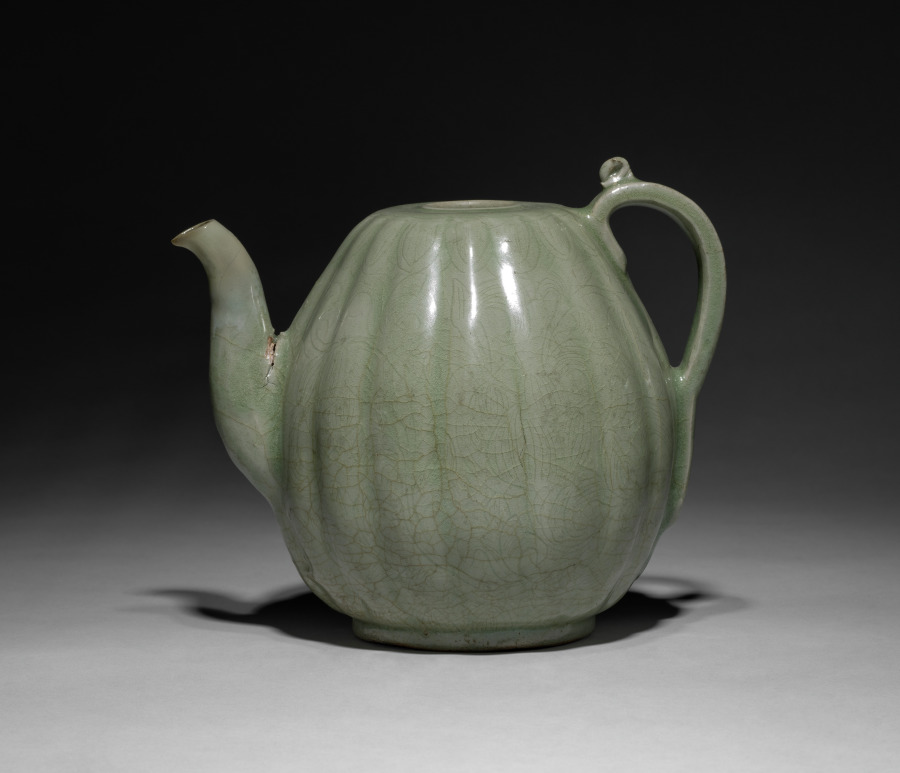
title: Wine Pot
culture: Korea, Goryeo dynasty (918–1392)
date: 918–1392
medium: pottery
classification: Ceramic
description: As early as the seventh century, the practice of drinking tea and wine became an important part of elite culture in Korea. Elites of the Goryeo period commissioned a variety of types of utensils and vessels including this elegant pot, not only to make their drinking experience more exciting, but also to show their appreciation of nature.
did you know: Originally the lid was not coupled with this pot.